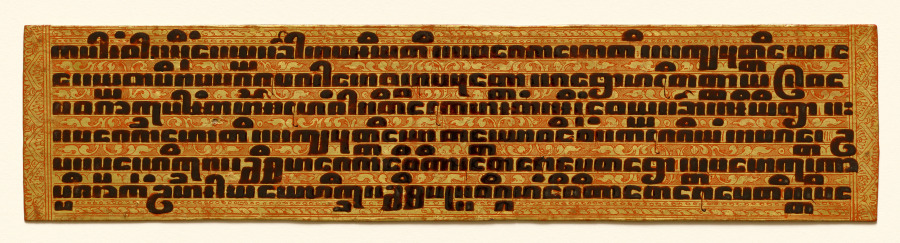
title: Text, folio 7 (recto) from a Kammavacha: Buddhist ordination text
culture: Myanmar (Burma)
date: 1800s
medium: Leaf: lacquer and gilding on cloth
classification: Manuscript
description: In premodern Burma, lay people commissioned lavishly ornamented manuscripts for ceremonial occasions, when officiants would read aloud from the text. Written in black lacquer, the text is in the language of Pali written in a Burmese script. It contains ordination rites and procedures for monastic ceremonies. The second to last page is covered with intricately drawn, winged celestial beings (nats) in gestures of praise. They fly amid intertwining vegetation—denoting bounty—that grows from serpentine forms that refer to rain clouds. Lionlike forms inhabit the space with them. The top and bottom covers are equally ornamented with jeweled floral patterning.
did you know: The Pali text of this manuscript is written in Burmese square script, which is also known as "tamarind seed script."